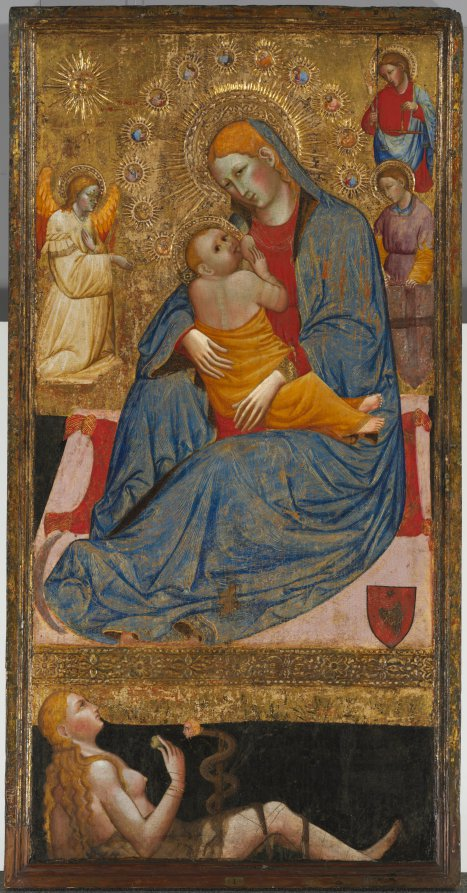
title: The Madonna of Humility with the Temptation of Eve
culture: Italy, the Marches, late 14th-early 15th Century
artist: Olivuccio di Ciccarello (Italian, Marche, 1360/65–1439)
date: c. 1400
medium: tempera and gold on wood panel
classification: Painting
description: The Madonna is seated humbly on the ground nursing her child. Saint George and the Archangels Gabriel and Michael kneel nearby, while Christ’s disciples appear radiating from the Madonna’s halo in the form of stars. In contrast with the Virgin’s purity, Eve lies in the lower part of the painting. Coaxed by the serpent, she raises the forbidden fruit to her mouth, thus condemning humankind through her original sin. The juxtaposition of these two images affirms the Incarnation and the role of Christ and the Virgin in the redemption story. The deep scratches on the surface of the panel, especially on the serpent’s face and Eve’s wrist, likely resulted from a zealous Christian’s symbolic attack on the power of evil. The artist, Olivuccio di Ciccarello, is known to have been active in the Marche in central Italy. Little is known of his life except that he was an important and prolific painter in Ancona, where he died. His paintings were formerly attributed to Carlo da Camerino, an apparently nonexistent artist, on the basis of a mistaken reading of his signature on a crucifix.